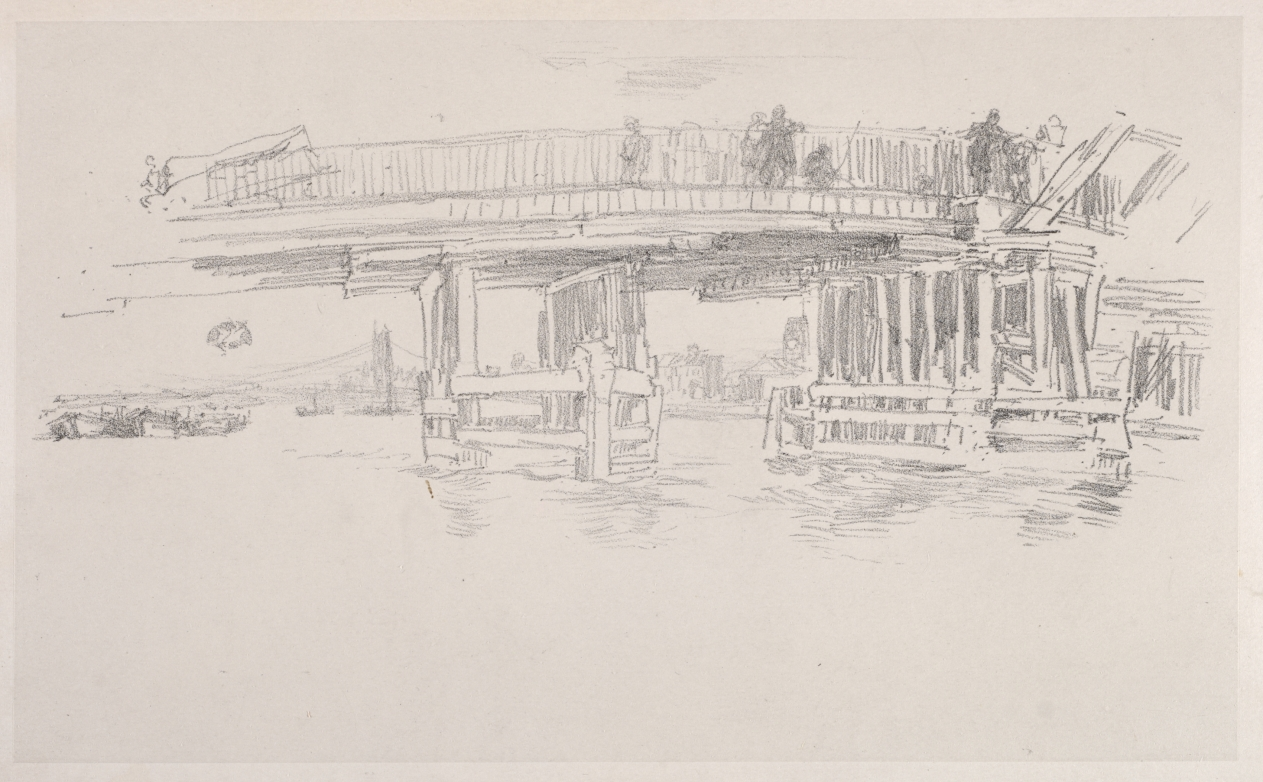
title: Old Battersea Bridge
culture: America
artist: James McNeill Whistler (American, 1834–1903)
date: 1879–86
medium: lithograph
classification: Print